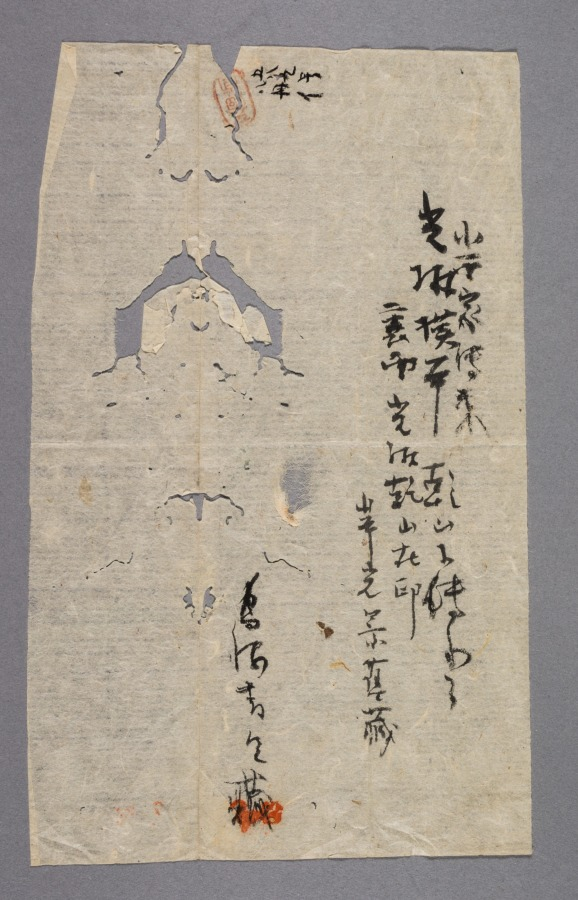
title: Pheasant and Grasses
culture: Japan, Edo period (1615–1868)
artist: attributed to Ogata Kōrin (Japanese, 1658–1716)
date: late 1600s–early 1700s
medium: hanging scroll; ink and color on paper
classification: Painting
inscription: two seals of artist, lower right.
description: Korin was a founder of the Rimpa (decorative) school of painting and was a keen observer of nature. The pheasant is often associated with autumn.